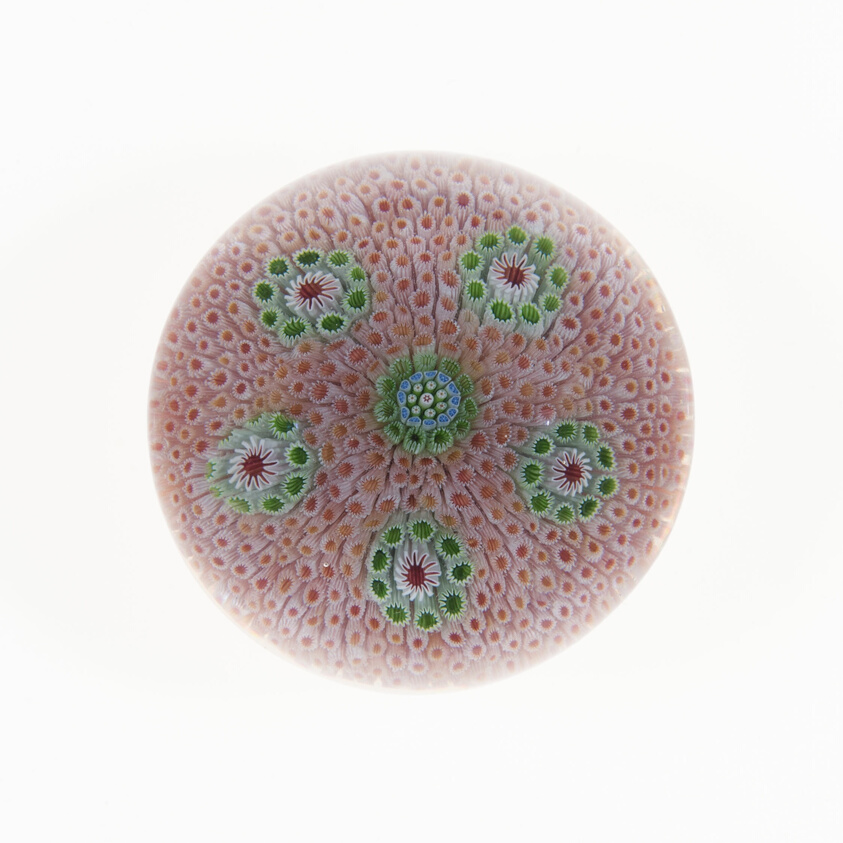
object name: Glass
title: Paperweight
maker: Saint-Louis Glassworks (Cristalleries de Saint-Louis); Lorraine, France, founded 1586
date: c. 1845/60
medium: Glass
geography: Saint-Louis-lès-Bitche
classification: paperweight; glass